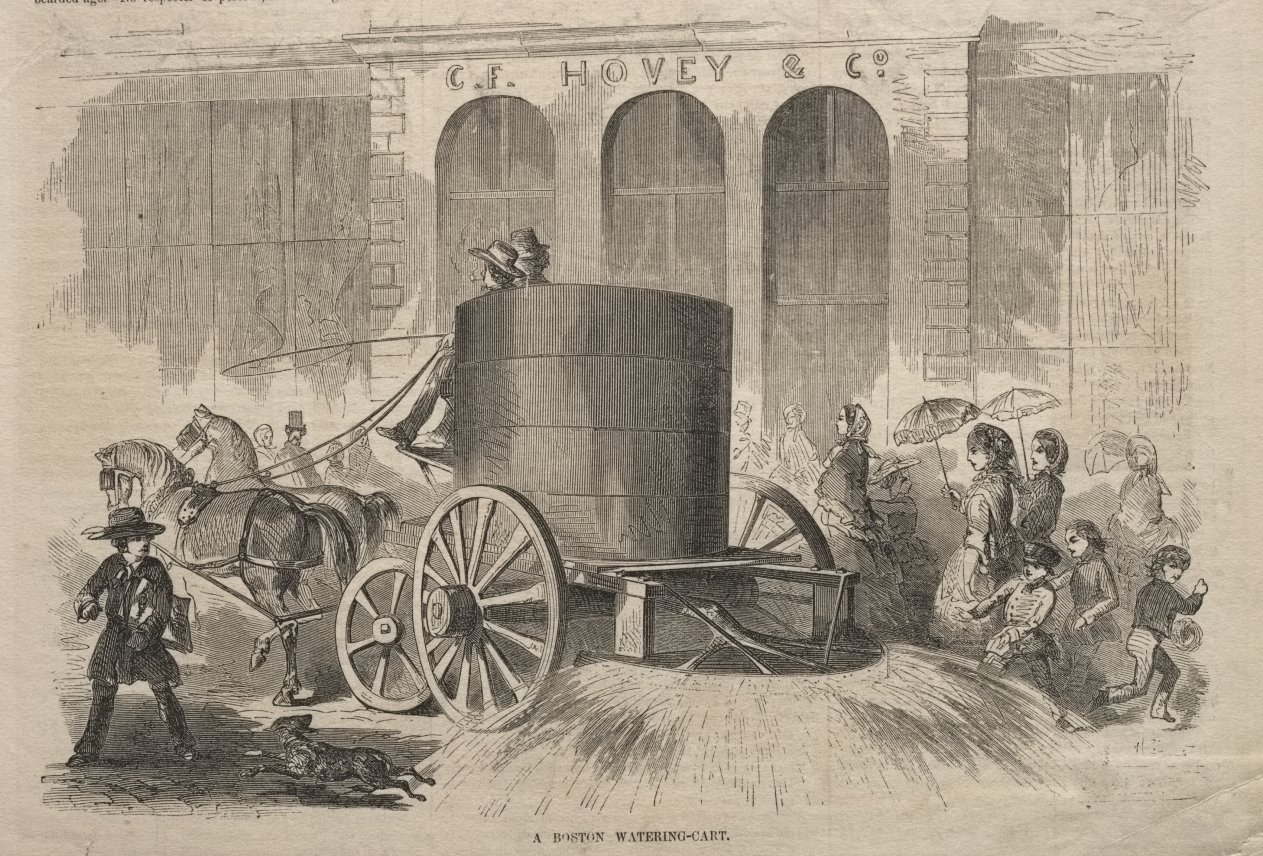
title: A Boston Watering-Cart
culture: America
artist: Winslow Homer (American, 1836–1910)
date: 1857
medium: wood engraving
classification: Print